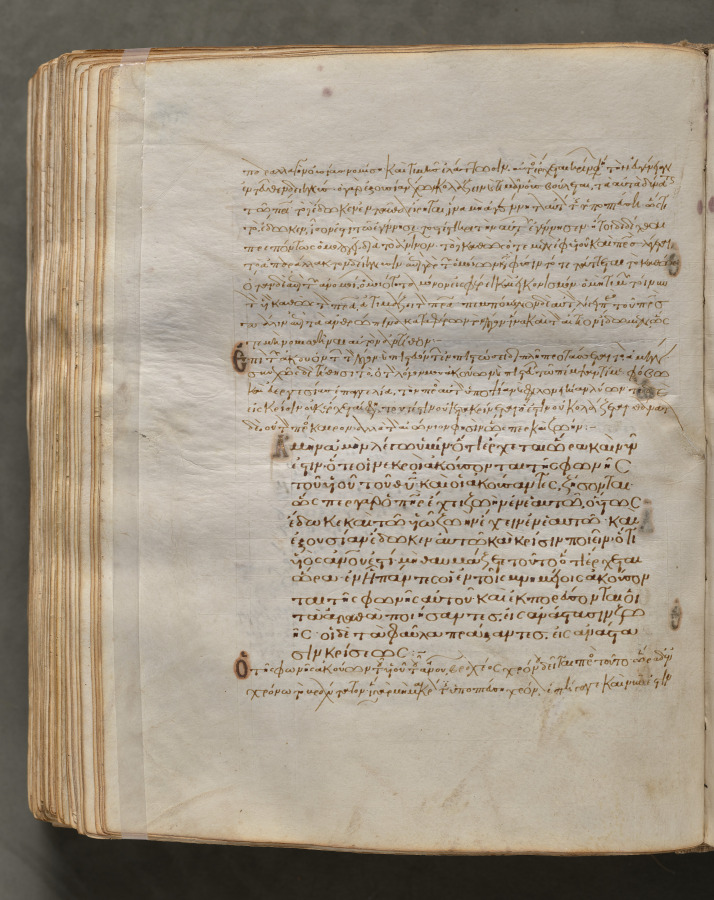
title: Text, folio 345 (verso), from a Gospel Book with Commentaries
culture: Byzantium, Constantinople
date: c. 1000–1100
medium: ink, tempera, and gold on vellum; leather binding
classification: Bound Volume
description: Each of the four gospels in this book opens on a page with brilliantly illuminated borders depicting the author of the text as well as birds—principally peacocks, symbols of the immortality of the soul—and fountains, representing the fountain of life and the salvation of the soul. This volume consists of 428 leaves with texts in Greek. Its level of sophistication suggests that it was probably written and decorated in a monastery in Constantinople.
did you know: Gospel books were carried in procession through Byzantine churches.